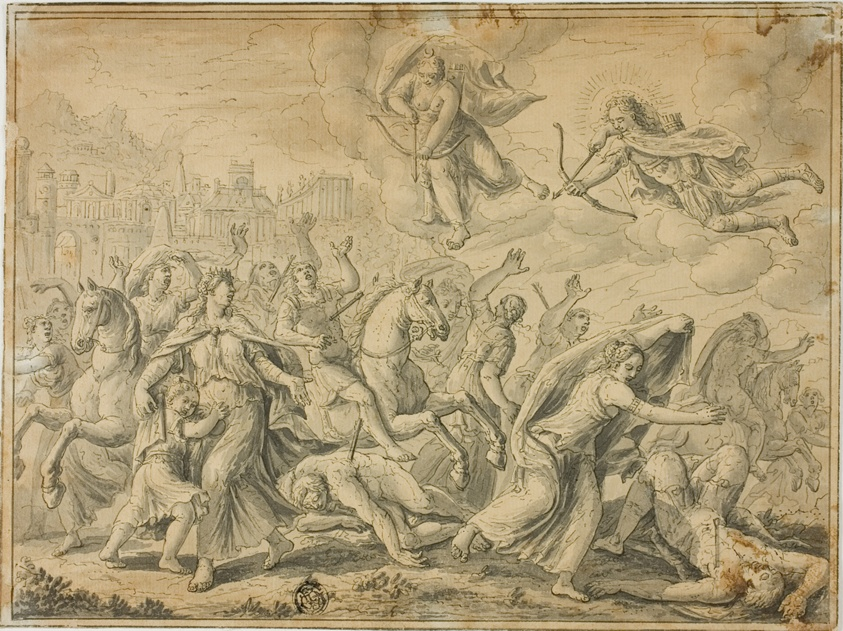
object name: Drawing and Watercolor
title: Death of Niobe's Children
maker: Possibly after Marten de Vos (Flemish, 1532-1603); or François Boitard (French, c. 1670-c. 1715); or Philibert Benoît Delarue (French, 1718-1780)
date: 1552/1725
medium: Pen and black ink, with brush and gray wash, on tan laid paper, laid down on fabric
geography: Flanders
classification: pen and ink drawings; drawings (visual works); prints and drawing